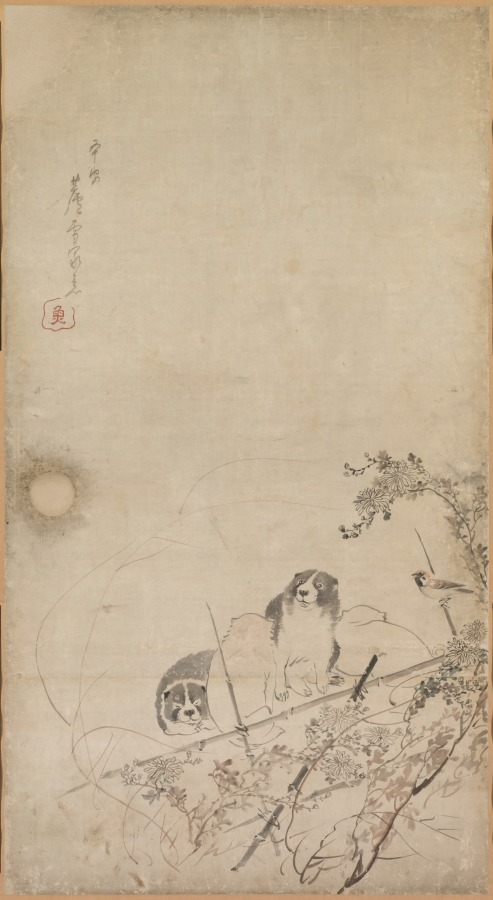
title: Puppies, Sparrows, and Chrysanthemums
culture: Japan, Edo period (1615–1868)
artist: Nagasawa Rosetsu (Japanese, 1754–1799)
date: c. 1792–94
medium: Fusuma panels remounted as hanging scrolls; ink and slight color on paper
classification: Painting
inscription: Inscription: 平安・芦雪寫意; transliteration: Heian, Rosetsu sha'i; sealed: 魚; seal transliteration: Gyo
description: These paintings were originally mounted as sliding doors (fusuma) used inside a building. The circular areas on the paintings’ paper surfaces are traces of the former positions of the door pulls (hikite). A flock of sparrows gathers on a trellis supporting flowering chrysanthemum. Below is a litter of puppies, some cavorting, others napping. The tender story created by the curious puppy peering up and tilting its head to listen to the bird’s insistent call in the leftmost part of the composition is characteristic of Nagasawa Rosetsu’s paintings, which often use animals to illustrate the human condition.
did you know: The round circular areas in the paintings' paper surfaces, each surrounded by a dark halo of embedded dirt and finger oils, indicate the location of the door "catches."